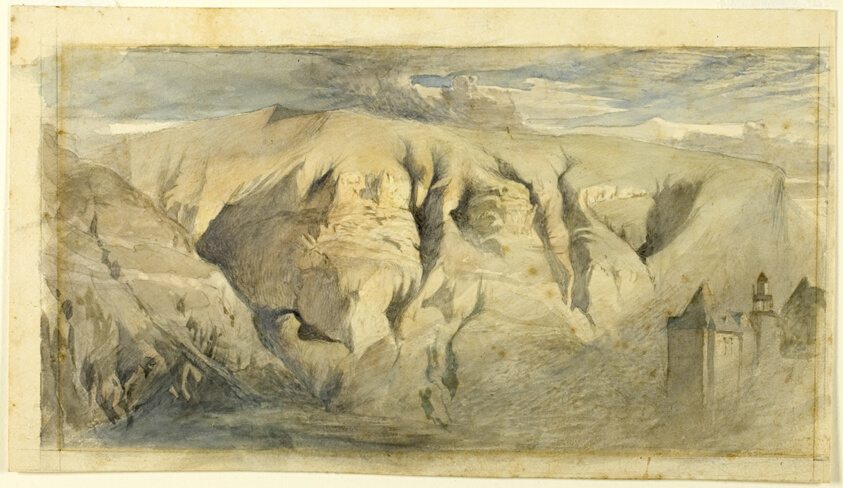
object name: Drawing and Watercolor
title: Mont Saleve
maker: John Ruskin (English, 1819-1900)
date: c. 1840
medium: Watercolor over graphite on cream wove paper, laid down on cream wove paper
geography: United Kingdom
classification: watercolor; drawings (visual works); prints and drawing